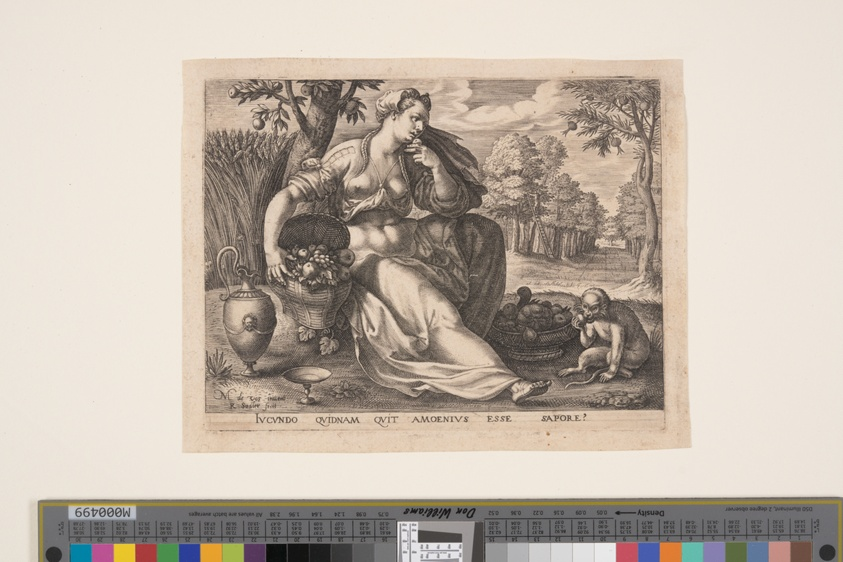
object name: Print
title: Taste, from The Five Senses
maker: Raphael Sadeler I (Flemish, 1560/61–1628/32); after Maarten de Vos (Flemish, 1532–1603)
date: 1581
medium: Engraving on paper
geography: Flanders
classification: engraving; paper; print; prints and drawing